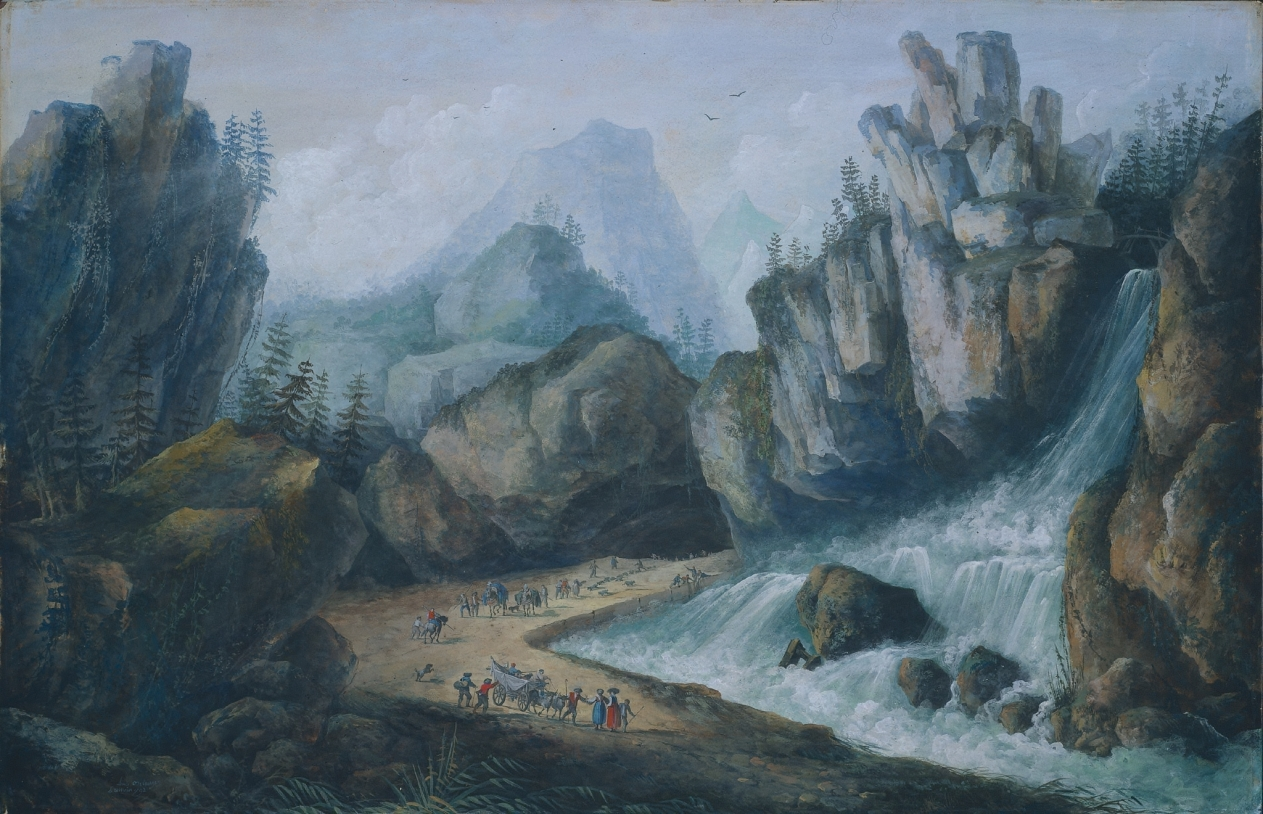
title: Torrent and Waterfall in the Alps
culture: France, 18th century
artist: Louis Bélanger (French, 1756–1816)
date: 1792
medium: gouache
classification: Drawing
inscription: signed, lower left, in gray gouache: Louis Belanger / Le romain 1792